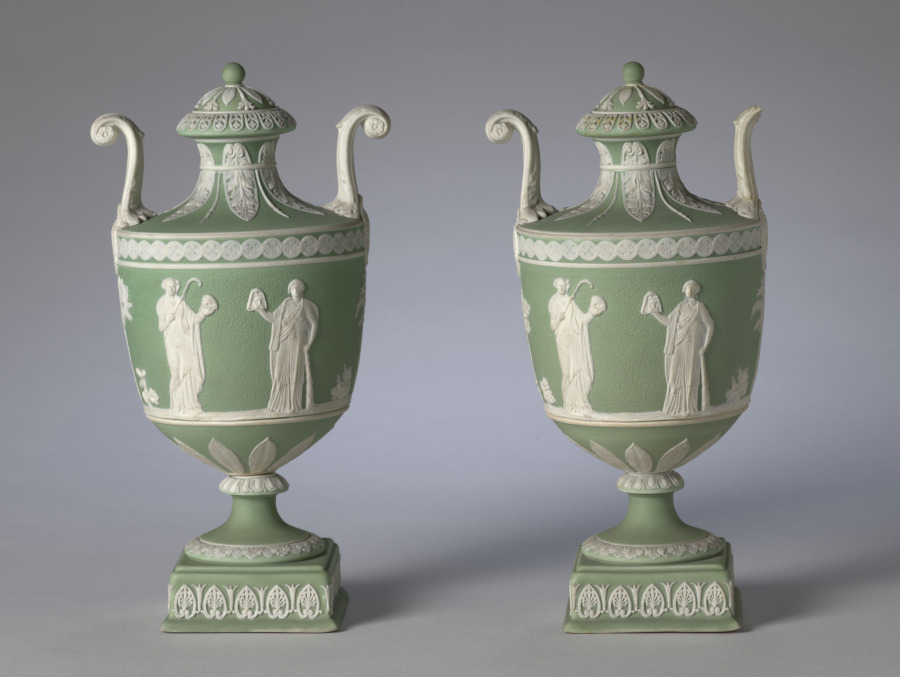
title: Pair of Covered Urns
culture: England, Staffordshire, late 18th-early 19th Century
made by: Wedgwood Factory (British)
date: c. 1800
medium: jasper ware with relief decoration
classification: Ceramic